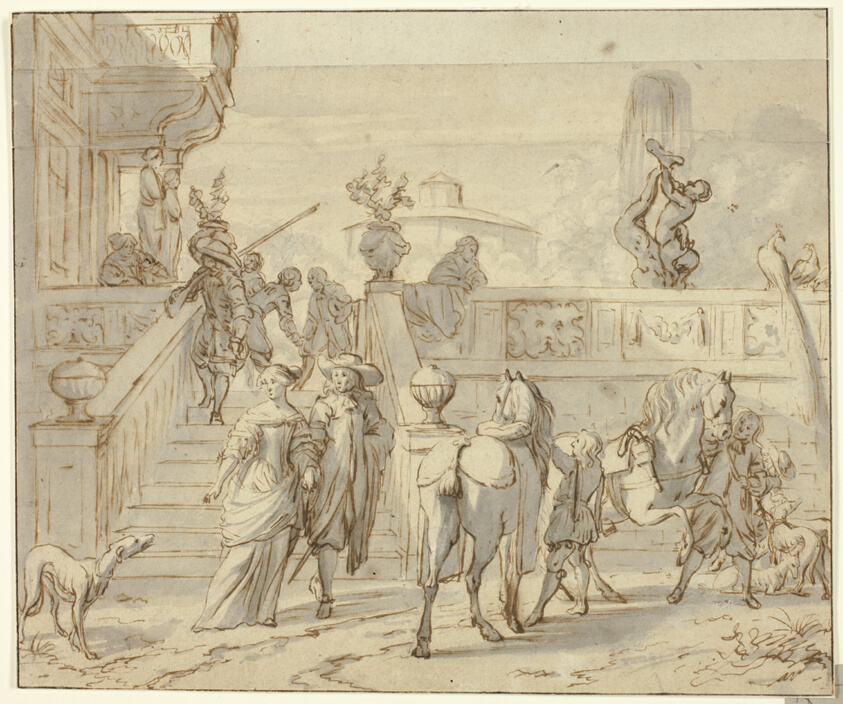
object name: Drawing and Watercolor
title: Departing for the Hunt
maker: Attributed to Jan Verkolje, I; Dutch, 1650-1693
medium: Pen and brown ink, with brush and gray wash, over traces of graphite, on buff laid paper, pieced and tipped onto card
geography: Holland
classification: ink or chalk wash; drawings (visual works); prints and drawing